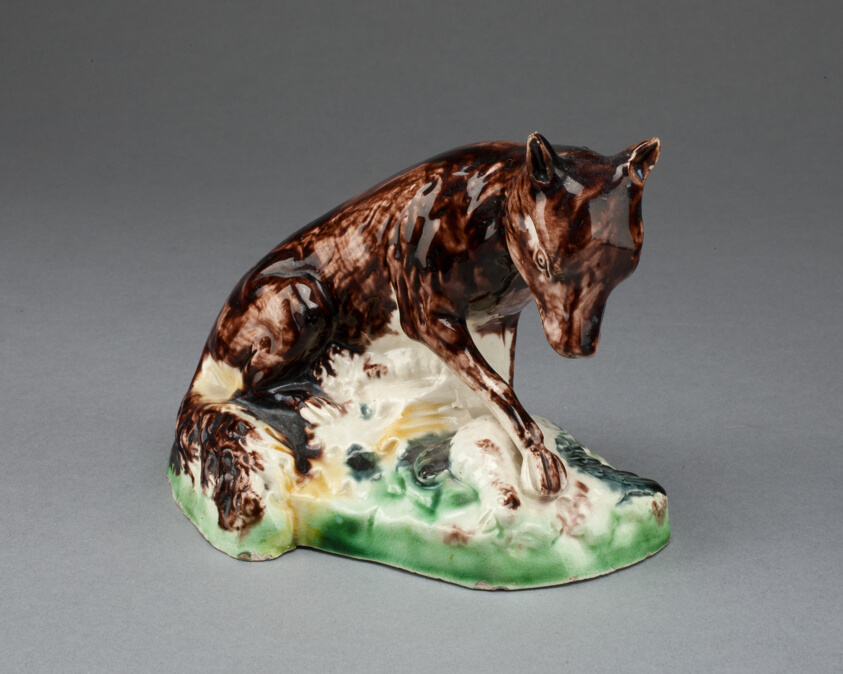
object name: Ceramics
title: Fox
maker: Staffordshire, England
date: c. 1780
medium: Lead-glazed earthenware (creamware)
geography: Staffordshire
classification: earthenware; creamware; ceramics; european decorative arts; lead-glazed earthenware